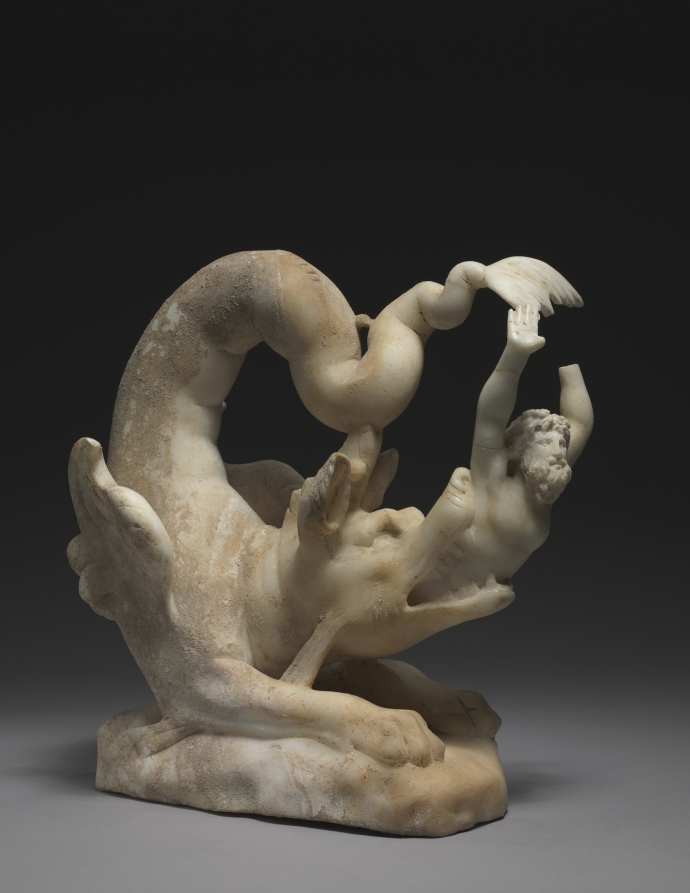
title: Jonah Cast Up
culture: Anatolia, late Roman-early Christian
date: 280–90 CE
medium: marble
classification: Sculpture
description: After disobeying the Lord’s command to proclaim judgment on the city of Nineveh, the Old Testament prophet Jonah was cast into the sea and swallowed by a sea monster. He spent three days praying inside the beast before being cast ashore. Here, the beast spits Jonah out of its mouth.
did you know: The fearsome creature spitting Jonah out of its mouth is a creation of the artist's imagination derived from the ancient Greek cetos, a sea monster. Like other mythical beasts, such as the griffin and the sphinx, this monster combines elements of several different animals. Which ones do you see when looking at this fantastical creature?